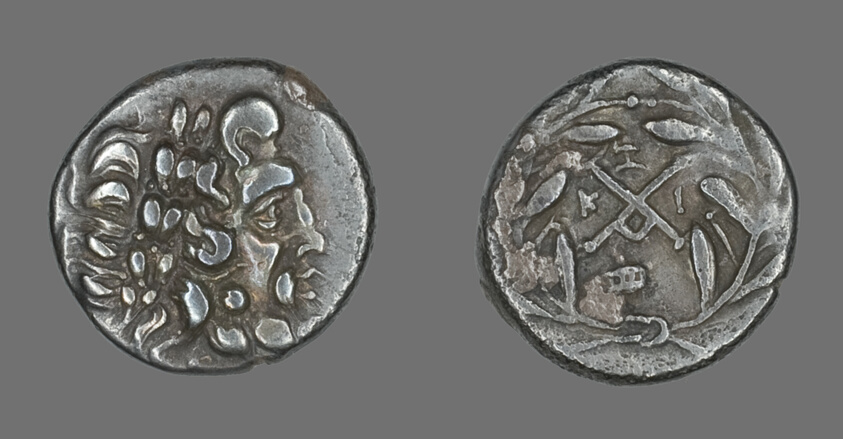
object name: Coin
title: Hemidrachm (Coin) Depicting the God Zeus Amarios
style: greek, ancient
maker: Greek, minted in Megalopolis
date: 234-146 BCE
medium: Silver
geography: Megalópolis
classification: coin; ancient art